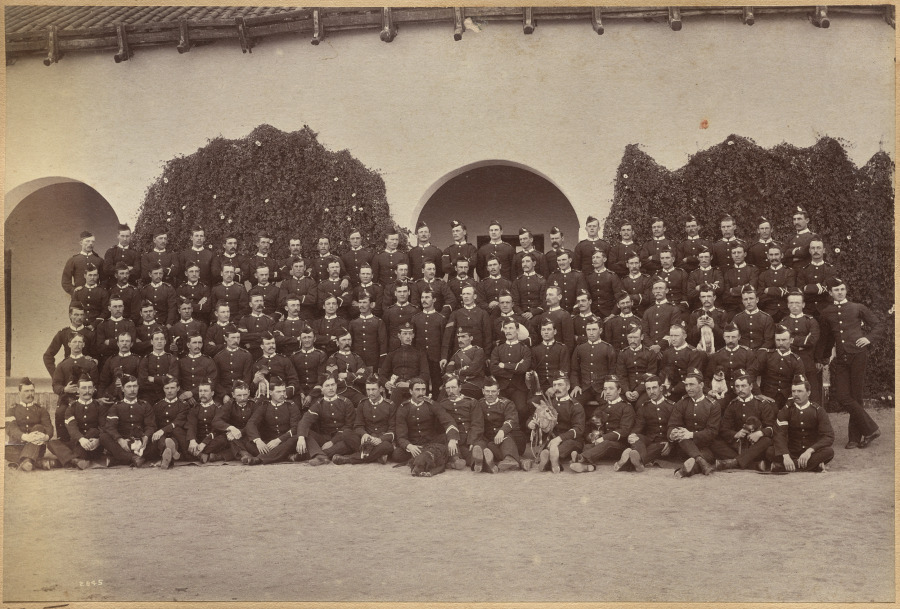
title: B. c/o Devonshire Regiment, Jhansi (recto)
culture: India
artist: Raja Deen Dayal (Indian, 1844–1905)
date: c. 1882–87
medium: albumen print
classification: Photograph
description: These photographs are part of an album, now disassembled, of around 105 photographs taken in India between 1885 and summer 1887 that provide glimpses into the lives of the British colonial elite and royal and upper-class Indians. The museum holds another group of 37 pictures from this album (2016.266), which was probably commissioned by a British civil servant visiting or working in India around 1888 as a personal souvenir of his experiences there.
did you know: Raja Deen Dayal is regarded now, and was considered during his lifetime, to be India’s most important 19th-century photographer.